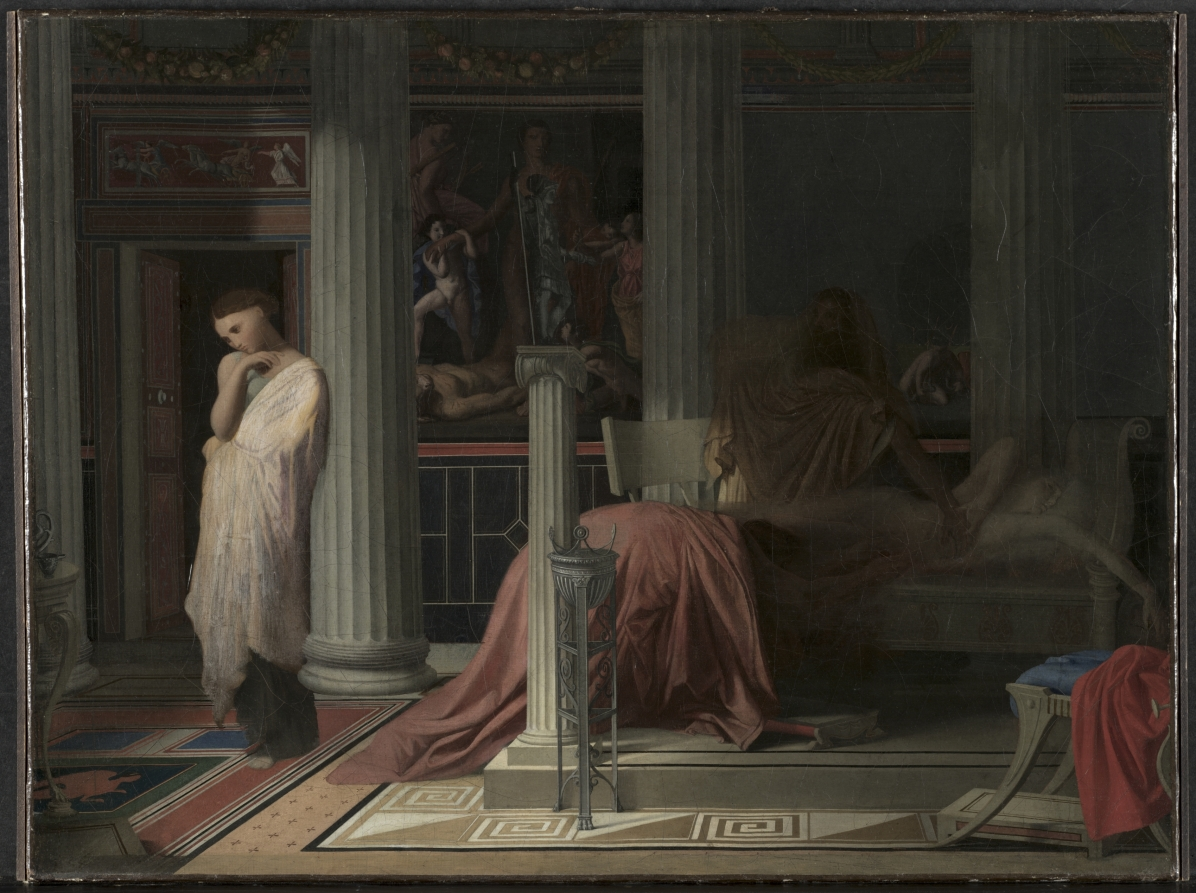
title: Antiochus and Stratonice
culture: France, 19th century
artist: Jean-Auguste-Dominique Ingres (French, 1780–1867)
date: c. 1838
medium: oil on linen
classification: Painting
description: Struck by a mysterious illness, Antiochus lies in bed near death. His grieving father, who has recently taken Stratonice as his wife, summons a doctor. Noticing that the sight of the young woman quickens Antiochus’s pulse and that passion causes his sickness, the doctor describes the youth’s predicament to his father, who selflessly offers Stratonice to his son. The subject, both a love story and an example of parental devotion, enjoyed considerable popularity well into the 1800s.